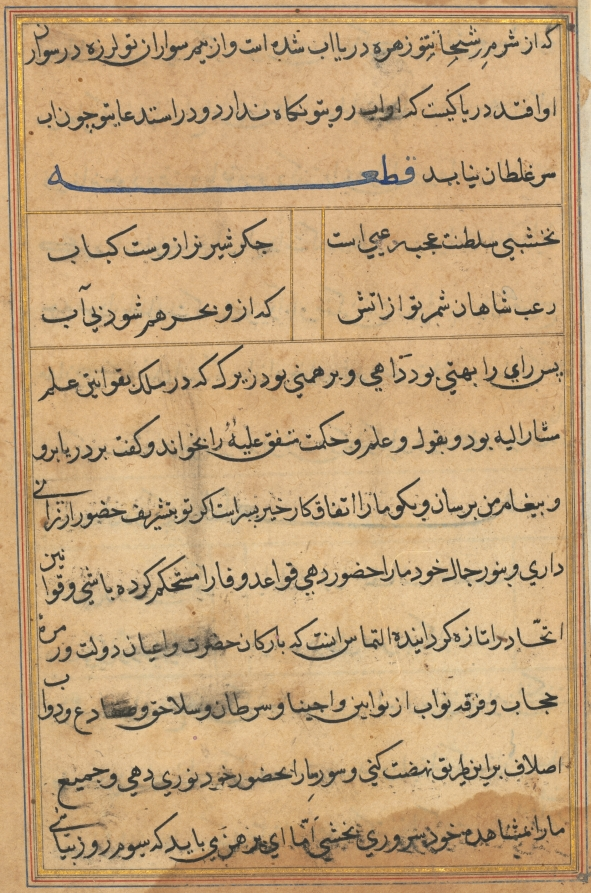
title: Page from Tales of a Parrot (Tuti-nama): text page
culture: Mughal India, court of Akbar (reigned 1556–1605)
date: c. 1560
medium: gum tempera, ink, and gold on paper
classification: Painting